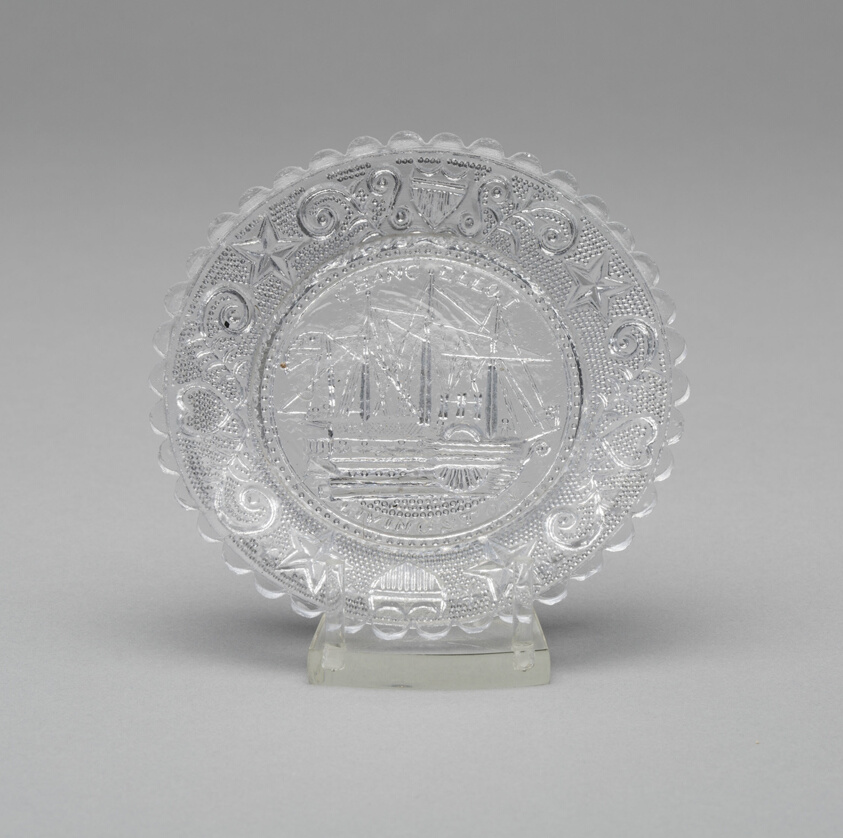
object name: Glass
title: Cup plate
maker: Artist unknown (American, 19th century); Sandwich, Massachusetts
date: 1835–38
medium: Pressed glass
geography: Sandwich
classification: plate (general, dish); glass; american decorative arts; american arts; decorative arts